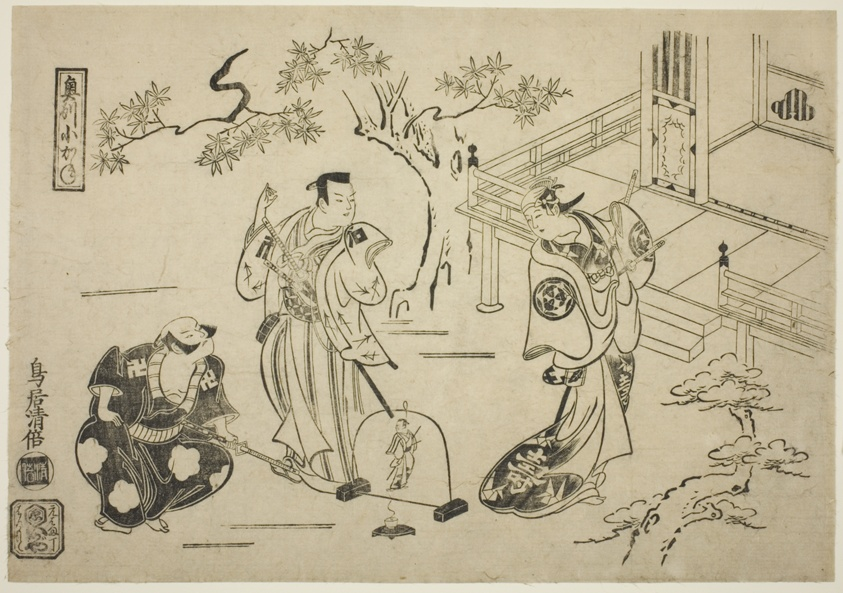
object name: Print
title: The Actors Ichimura Tamagashiwa I as Iwaki Hime, Murayama Heiemon III as Katsuta Jiro, and Katsuyama Matagoro as Minamoto no Yoshiie in the play "Yoroi Kurabe Oshu Kogane," performed at the Ichimura Theater in the eleventh month, 1716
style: Japanese (culture or style)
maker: Torii Kiyomasu I (Japanese, active c. 1704–18 (?))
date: 1716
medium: Woodblock print; oban, sumizuri-e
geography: Japan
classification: woodblock print; print; asian art; woodblock